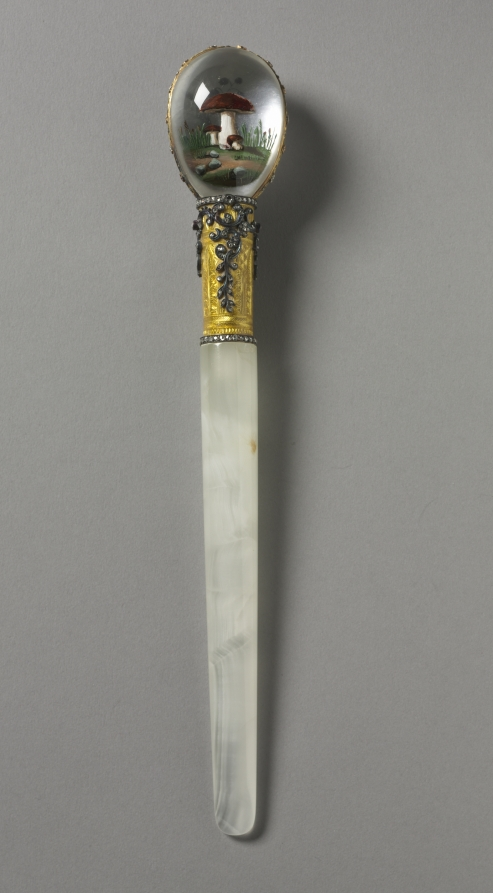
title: Paper Knife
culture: Russia, St. Petersburg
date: c. 1860 ?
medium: blade: agate; collar: transparent yellow enamel on an engine-turned ground mounted in gold set with diamonds, and the ovoid finial of two pieces of rock crystal carved on flat surfaces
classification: Miscellaneous